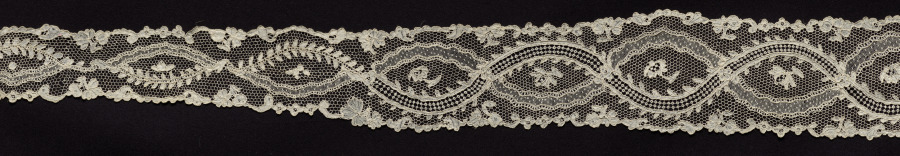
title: Lace Lappet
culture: France, Argentan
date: 1715–74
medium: Linen: needle lace (Point de Argentan)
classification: Lace